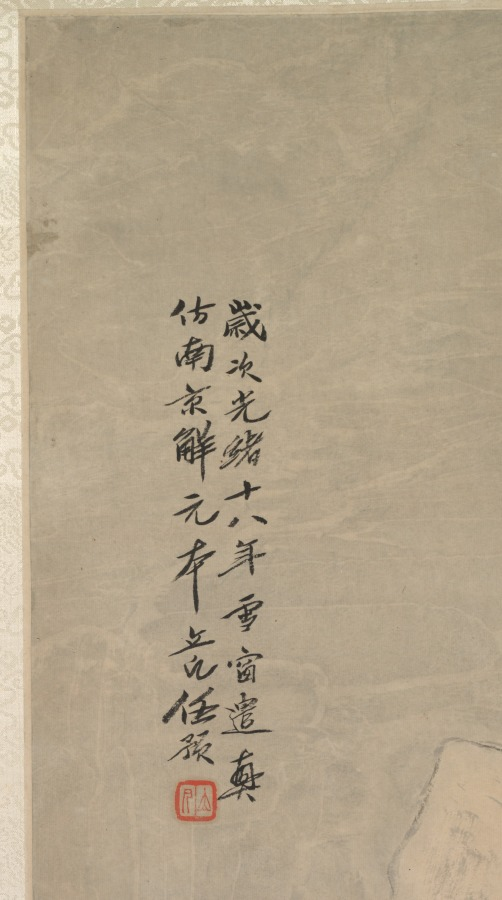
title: Landscape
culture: China, Qing dynasty (1644-1911)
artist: Ren Yu (Chinese, 1853–1901)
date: 1892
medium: Hanging scroll; color on paper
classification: Painting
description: This seasonal landscape is from a set of four hanging scrolls by Ren Yu. He was the youngest, most eccentric, and least prolific of the Four Rens, a family of prominent painters in Shanghai during the late Qing dynasty (1644–1911). Perhaps due to his opium habit and subsequent financial difficulties, Ren Yu tended to be lackadaisical in his work. The few remaining high-quality paintings hint at his artistic potential lost to opium. Though Ren’s premature death left his artistic promise unfulfilled, his paintings were acquired and donated to the museum by Charles Lang Freer (1854–1919), a wealthy businessman and art collector from Detroit. As Freer had hoped, this donation of Ren Yu paintings inspired the young Cleveland Museum of Art to continue to expand its own Chinese painting collection.